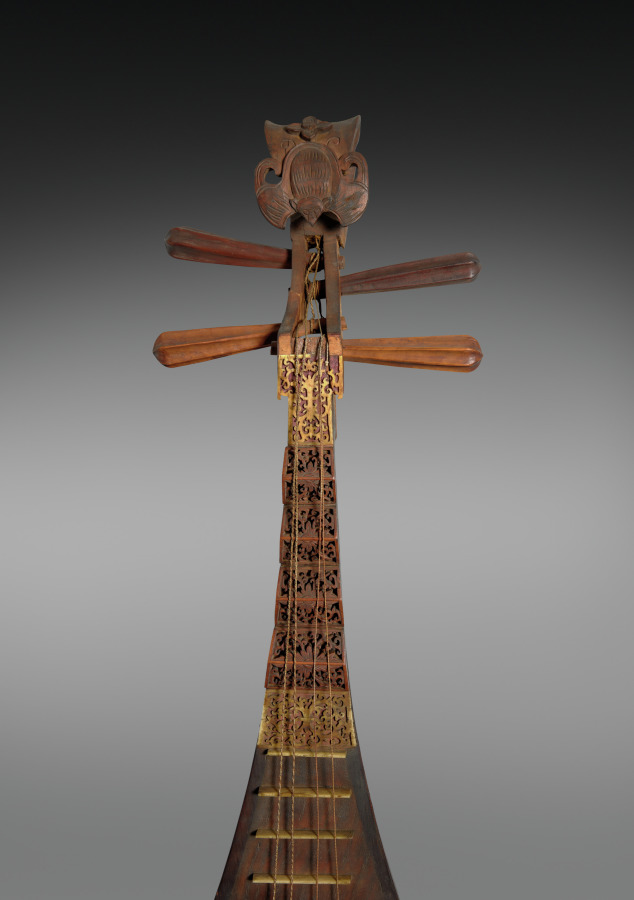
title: Pipa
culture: China, Qing dynasty (1644-1911)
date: 1800s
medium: Wood, ivory, bone, gut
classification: Musical Instrument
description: The term pipa, known since the 3rd century BC, describes the playing motion of the right hand: pi, “to play forward” (left), and pa, “to play backward” (right). A type of lute played with the fingers, it is used in opera and storytelling ensembles and has an impressive, virtuosic solo repertoire. Historic imagery, such as wall paintings, documents the spread of the pipa, along the Silk Road from western and central Asia to China. The bat finial here is a commonly used device on 19th-century Chinese lutes symbolizing good luck.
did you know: The string holder is made of bone.